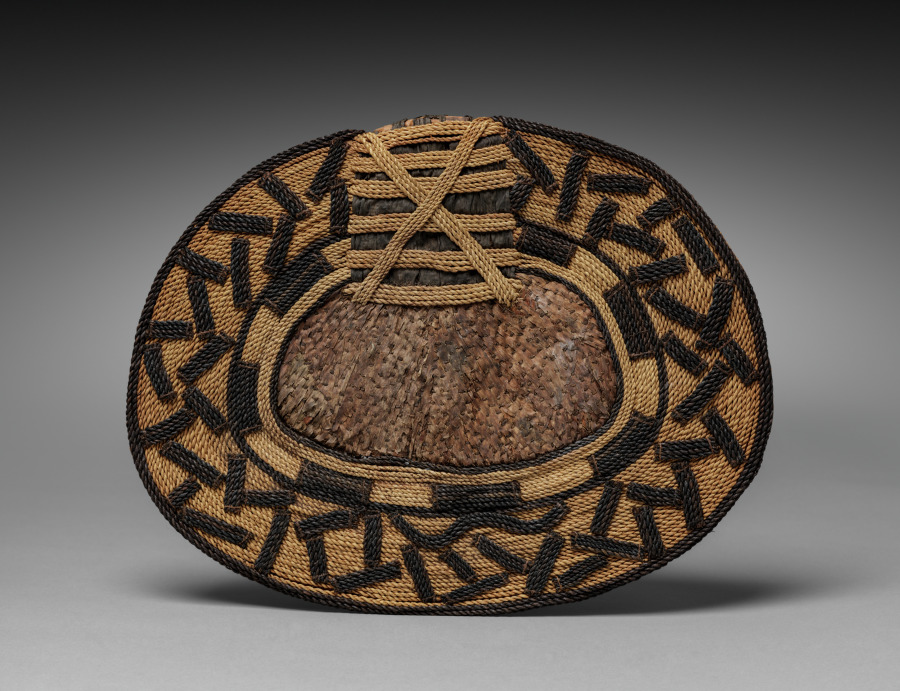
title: Back Skirt/Sitting Pad (negbe)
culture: Africa, Central Africa, Democratic Republic of Congo, Mangbetu-style makers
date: by 1928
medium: Plant fibers and dye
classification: Garment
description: Egbe (singular: negbe) were fashionable and practical garments aristocratic Mangbetu women made for special occasions. Worn over a skirt, it tied onto a girdle along with a frontal “apron.” The curved interior piece rested on the lower back. Thickly woven, flexible natural fibers bent with the body, cushioning the wearer’s behind when sitting. When the woman was standing, the decorated flat portion faced outward, showing off bold geometric motifs. Egbe were among items sold to foreigners at the Mangbetu king’s encouragement as the Mangbetu actively constructed their self image for outsiders during the 1920s and 1930s.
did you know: A contemporary fashion in 1929, when it was purchased or collected, this egbe is now a historical document of past styles.